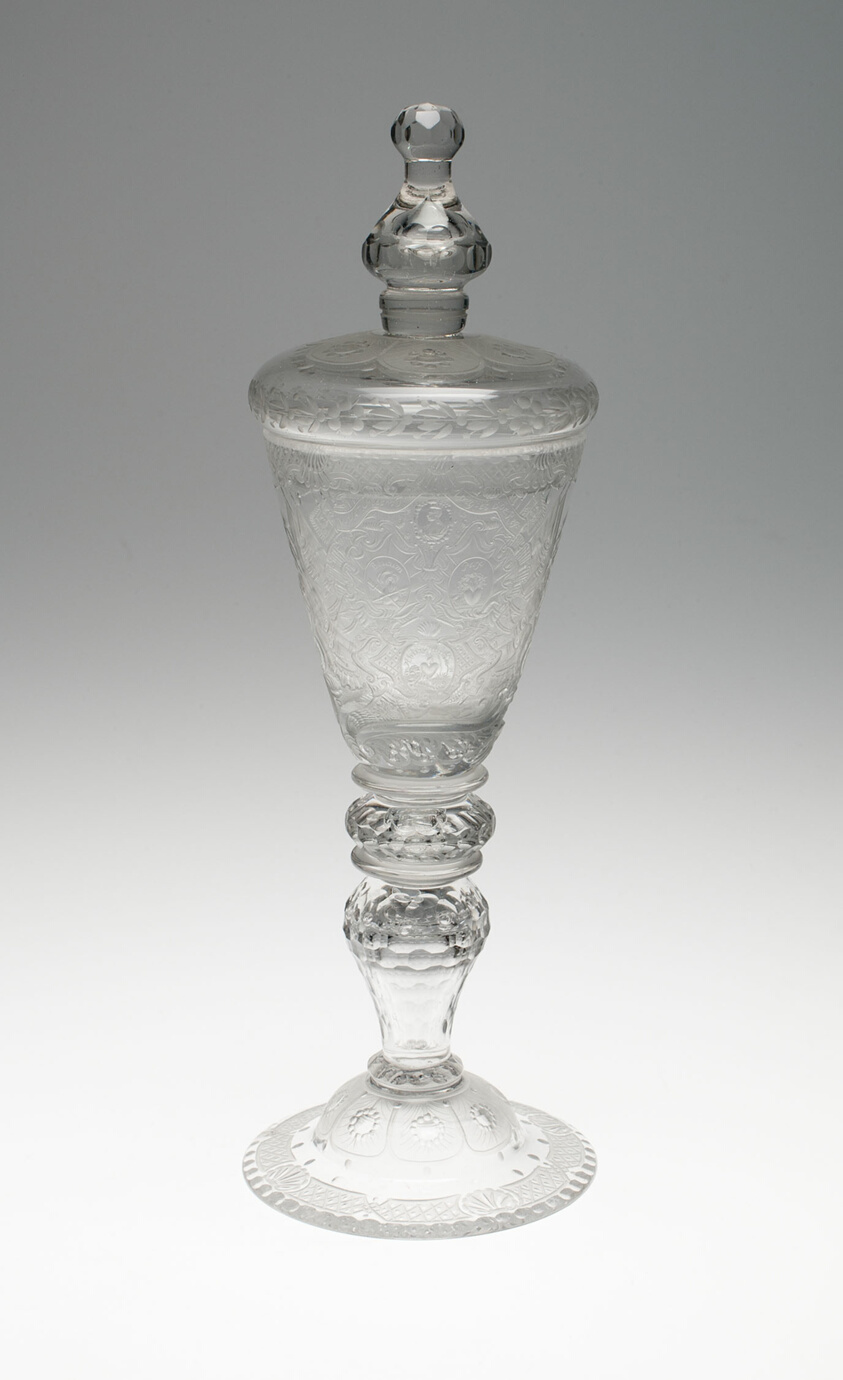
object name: Glass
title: Goblet with Cover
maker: Germany, Brunswick; Probably engraved by Johann Heinrich Balthasar (German, active 18th century)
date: c. 1750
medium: Glass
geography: Brunswick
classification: drinking vessel; glass; european decorative arts